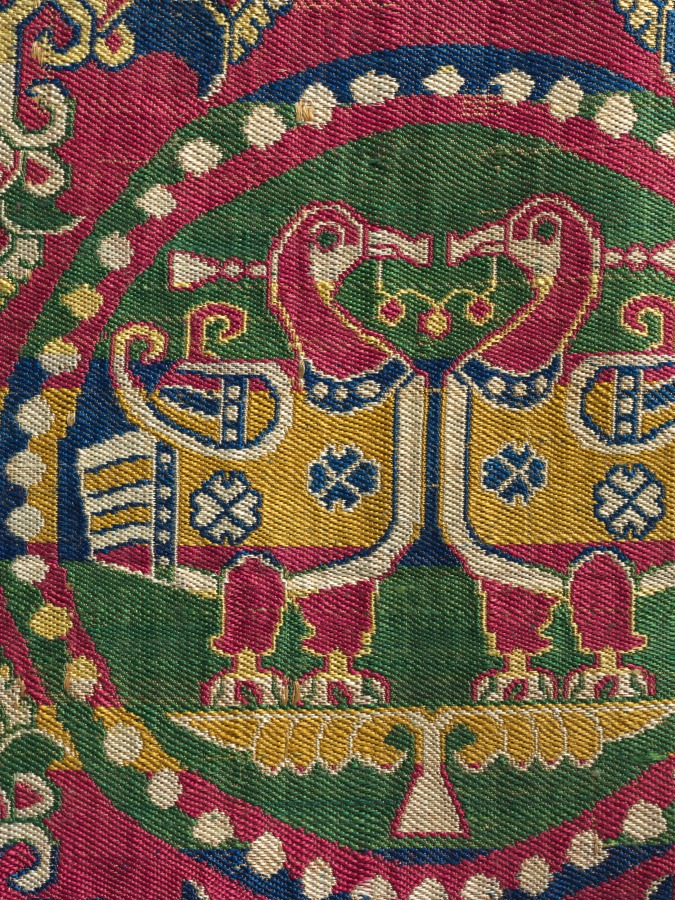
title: Child’s Coat with Ducks in Pearl Medallions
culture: Probably Sogdia (present-day Uzbekistan); China, Tang dynasty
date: 700s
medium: Silk: weft-faced compound twill weave (samite)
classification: Garment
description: The coat’s outer fabric is woven in five brilliant colors featuring paired ducks in pearl roundels, hallmarks of the precious and highly desired silks from Sogdia. The coat’s inner lining is a twill damask with a floral pattern made in China. The combination of Sogdian and Chinese silks in one garment with Tibetan ownership history is evidence of the vital exchange and cultural interaction among the peoples living along the trade routes of the Silk Road. This precious coat was presumably made for a Tibetan prince. Given the coat’s pristine condition, though, it is unclear whether the garment was ever worn, or was used as a diplomatic gift or perhaps as currency.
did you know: This coat is part of a set of garments that originally included an outer pair of pants and silk boots made from the same fabric.